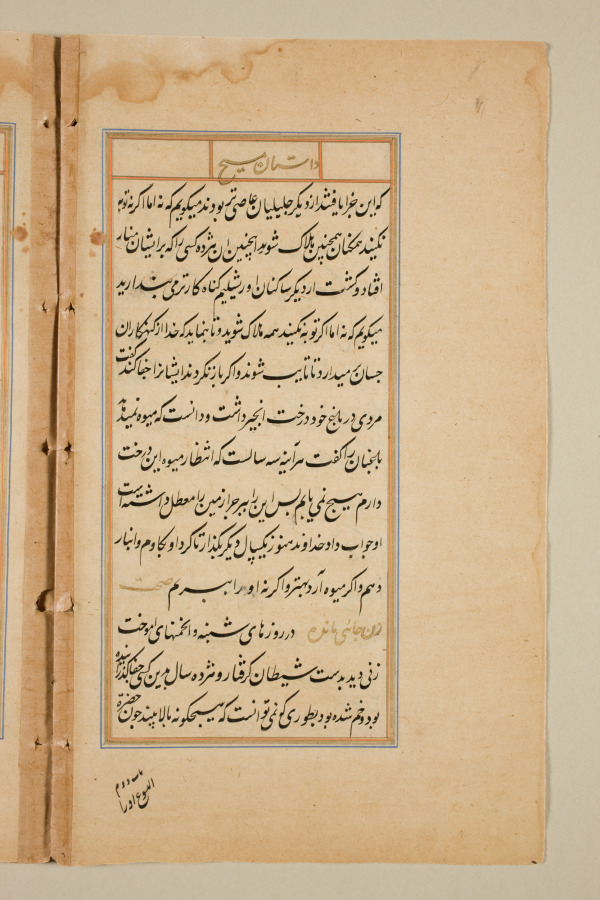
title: Text page from a Mirror of Holiness (Mir’at al-quds) of Father Jerome Xavier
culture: Mughal India, Allahabad, made for Prince Salim (1569–1627)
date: 1602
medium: Ink and gold on paper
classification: Manuscript